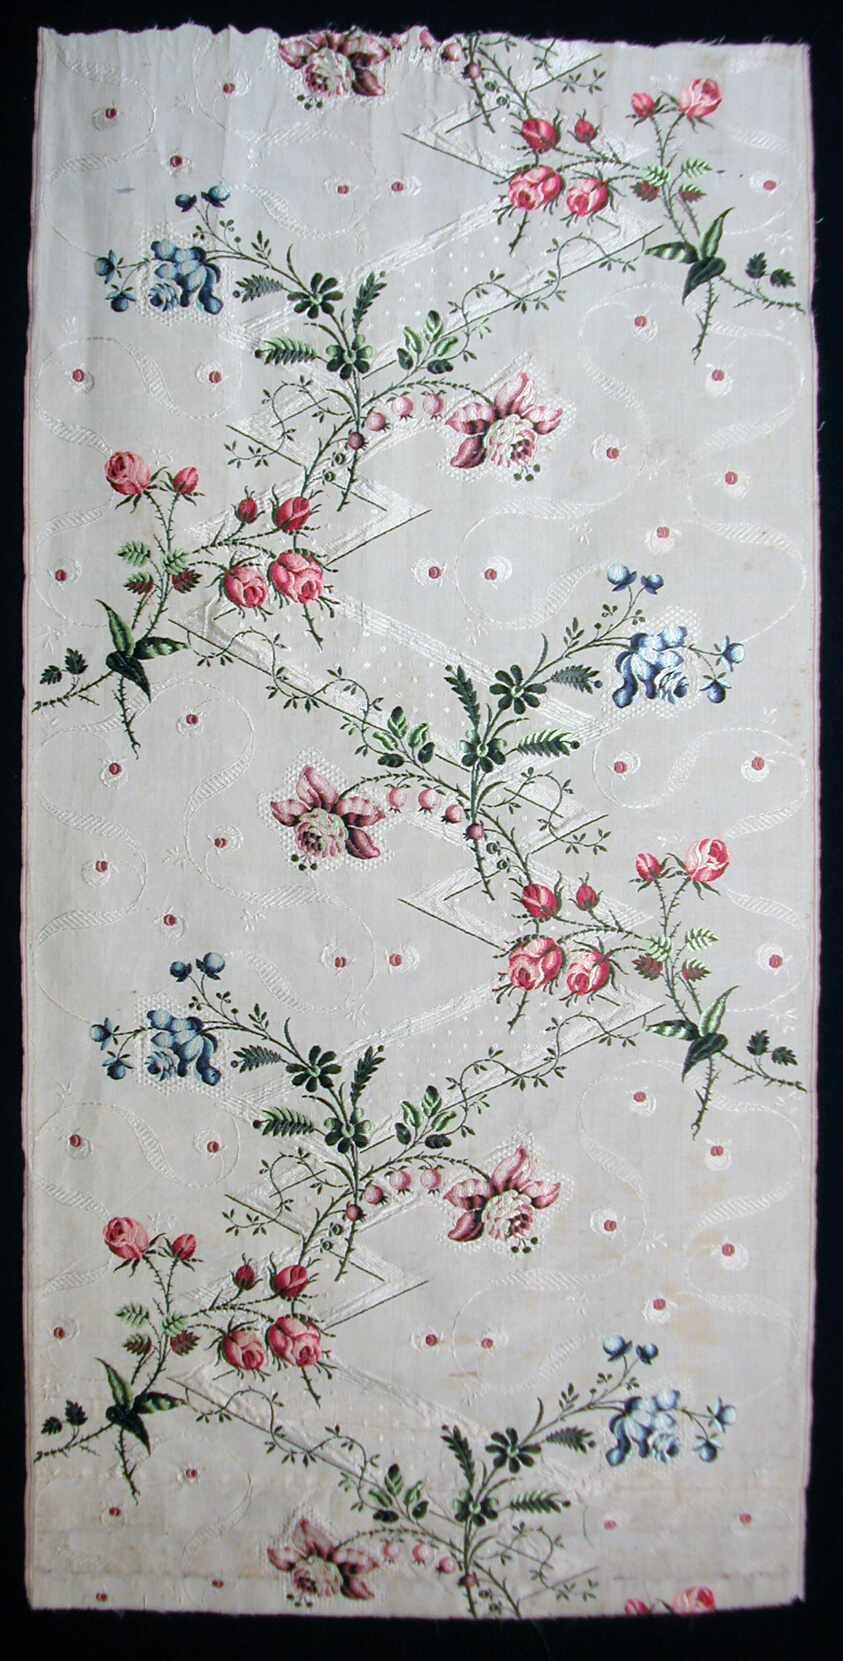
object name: Textile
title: Panel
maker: England, Spitalfields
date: 1750s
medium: Silk, plain weave with supplementary patterning and brocading wefts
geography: Spitalfields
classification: weaving; textile